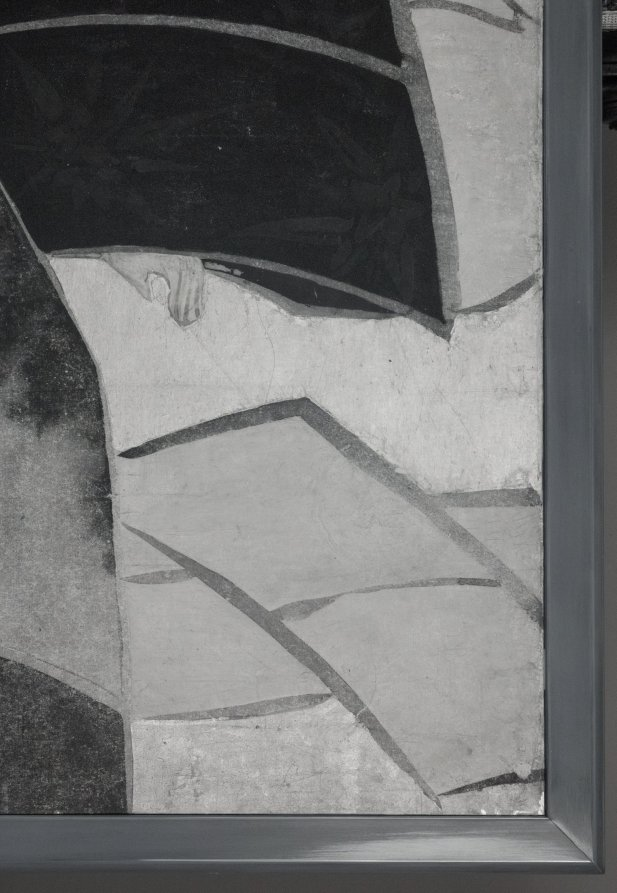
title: Thirty-Six Poetic Immortals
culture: Japan, Edo period (1615–1868)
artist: attributed to Tatebayashi Kagei (Japanese, active mid-1700s)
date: mid 1700s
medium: two-fold screen; ink, color, and gold on paper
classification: Painting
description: Fujiwara no Kintō (996–1075), a Japanese courtier, scholar, and poet, compiled select examples by the most celebrated composers of 31-syllable poems (waka) from the 600s to the 1000s. Painters soon made these “thirty-six poetic immortals” a favorite subject, traditionally presenting the poets in sequential, idealized portraits paired with their poems. In this interpretation, a chronologically impossible gathering of these great talents is in progress. The screen’s composition follows one devised by design virtuoso Ogata Kōrin (1658–1716).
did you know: The green surface edged with stripes at the upper left of the painting represents tatami matting with a silk border.